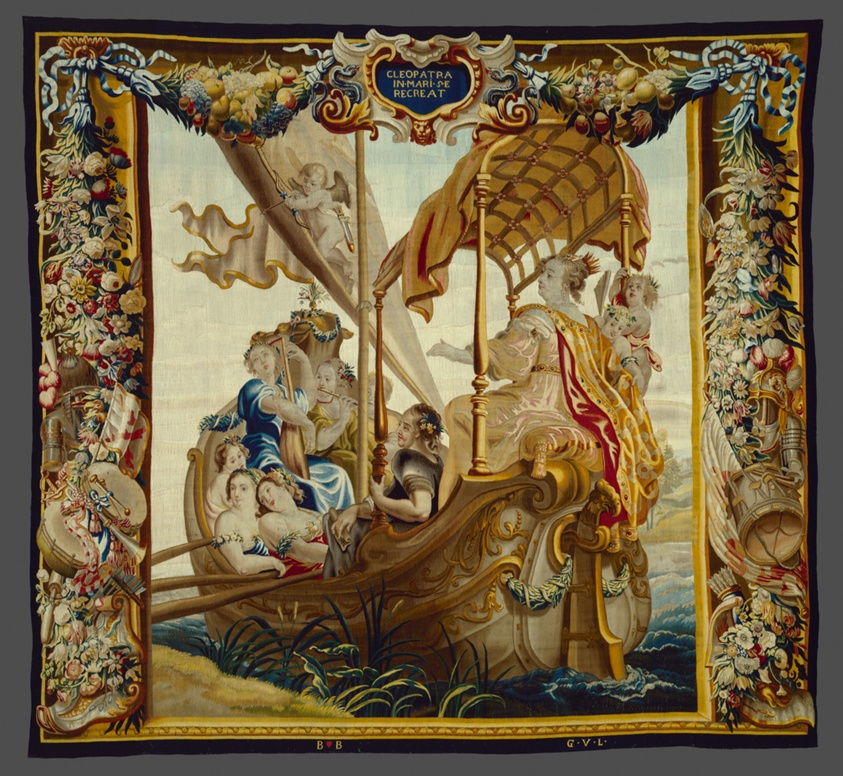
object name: Textile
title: Cleopatra Enjoys Herself at Sea from The Story of Cleopatra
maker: After a design by Justus van Egmont (Flemish, 1601–1674); Woven at the workshop of Willem van Leefdael (Netherlandish, 1632–1688); Flanders, Brussels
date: c. 1680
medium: Wool and silk, slit and double interlocking tapestry weave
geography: Flanders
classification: weaving - tapestry; textile